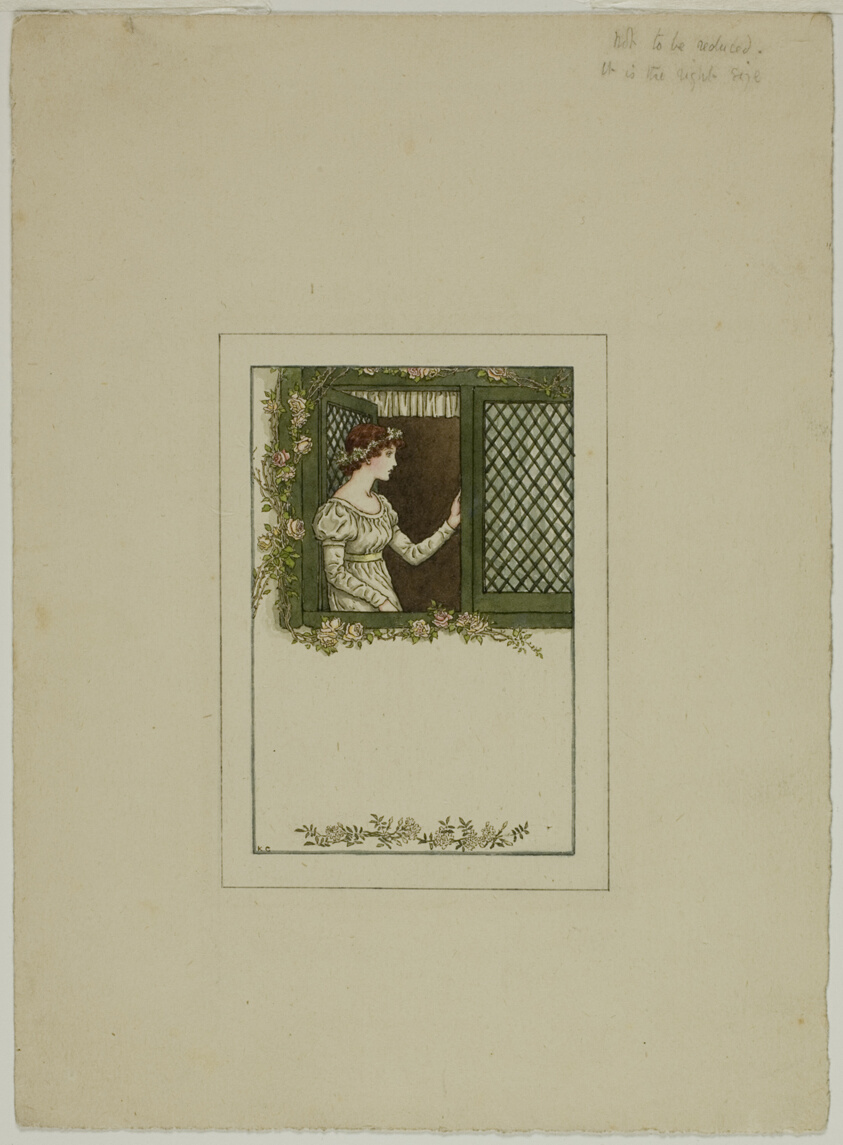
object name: Drawing and Watercolor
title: Woman at Lattice Window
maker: Kate Greenaway (English, 1846-1901)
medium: Pen and black ink and watercolor, over traces of graphite, on ivory wove paper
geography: England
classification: pen and ink drawings; drawings (visual works); prints and drawing